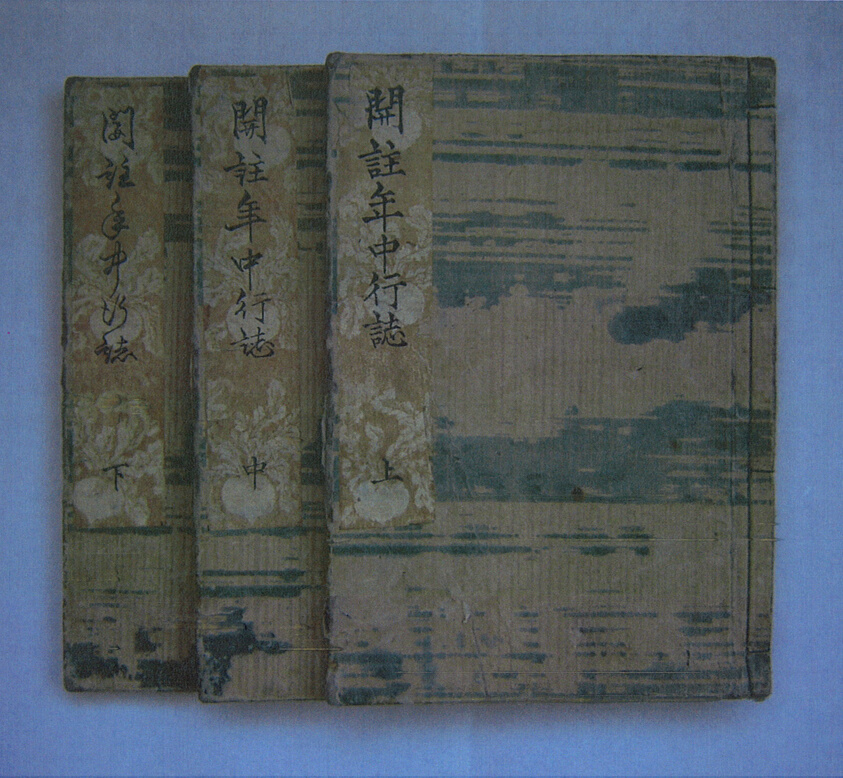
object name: Book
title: Kaichu nenju gyoji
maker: Utagawa Sadakage (Japanese, active c. 1818-1844)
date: 1834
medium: Color woodblock printed books, 3 volumes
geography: Japan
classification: book